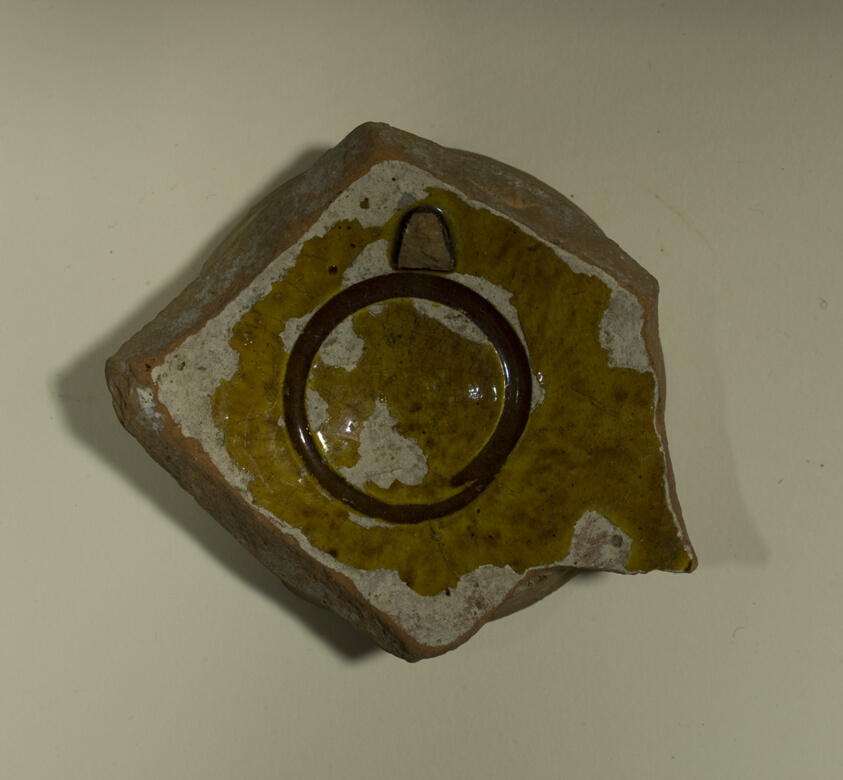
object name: Decorative Arts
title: Fragment of a Bowl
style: byzantine, european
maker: Byzantine (Greece, Thessaloniki)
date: 13th-14th century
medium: Ceramic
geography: Istanbul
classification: fragment; ceramics; vessel; bowl; asian art; decorative arts